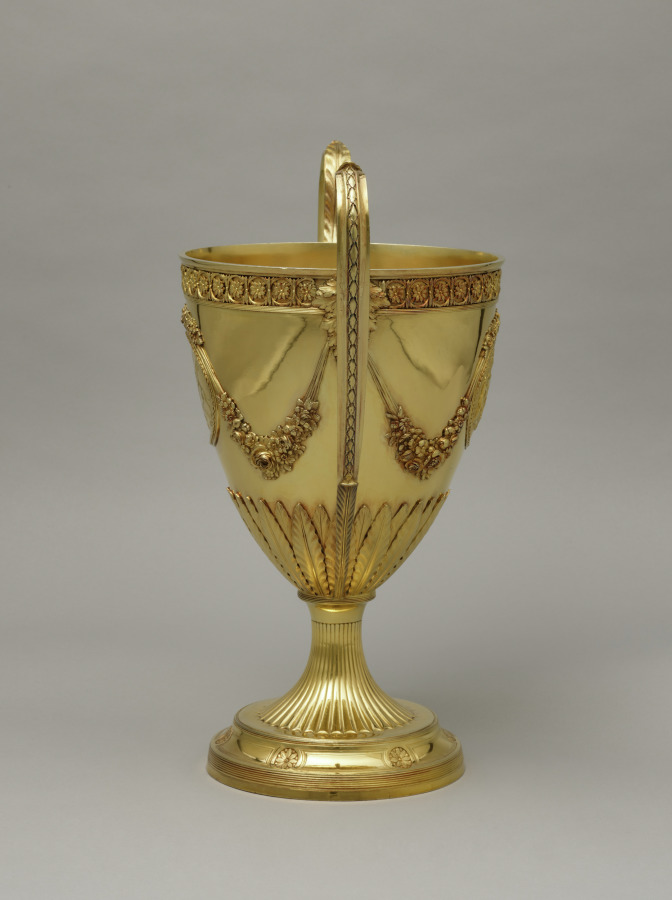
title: Trophy Cup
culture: England, 18th century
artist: Peter Bateman (British, 1740–1825)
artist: Anne Bateman (British, 1748–1813)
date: 1792–93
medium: silver gilt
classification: Silver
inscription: Engraved arms: Grosvenor impaling Egerton and Grey (arms of Robert Grosvenor (1767–1845), the first Marquess of Westminster, and Lady Eleanor Egerton (1770–1846))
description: Silver fulfilled a prominent role in projecting wealth, status, power, and ritual in British life during the 1600s and 1700s. Elaborate forms such as this trophy, with its swags of flowers, neoclassical rosettes, and acanthus spears, not only represented wealth in its sheer silver weight but also provided royal and aristocratic owners a surface for displaying engraved coats of arms. Engraved on one side of this trophy cup can be found the arms of Robert Grosvenor (1767–1845), the first Marquess of Westminster, and Lady Eleanor Egerton (1770–1846), whom he married in 1794, a year after the trophy’s completion. The other side depicts preparations for a horserace, the most culturally significant leisure activity enjoyed by aristocratic families in the 1700s. Grosvenor owned a number of famous horses and was likely awarded this trophy following a successful race.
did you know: This trophy cup has a lid. See cover record.